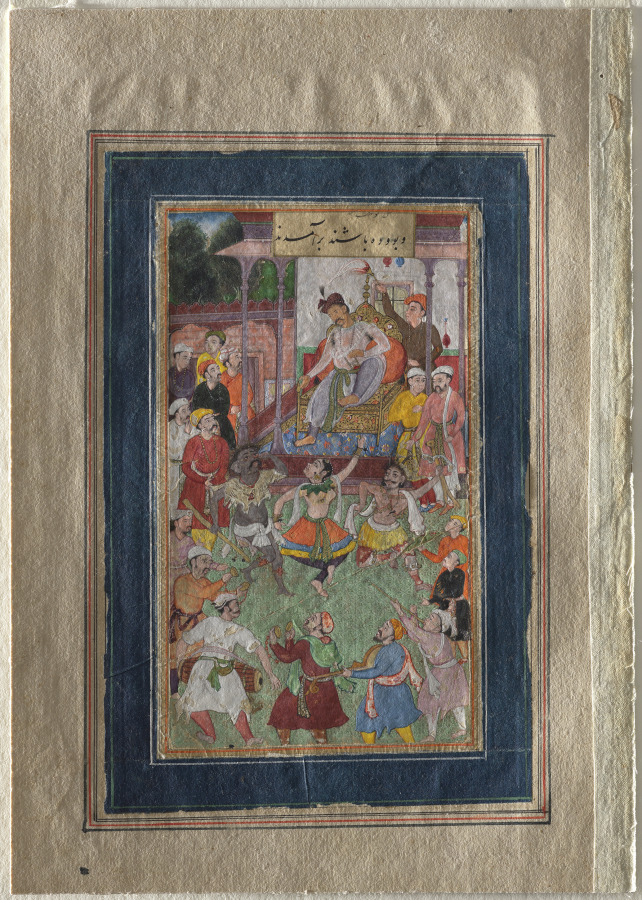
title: Grotesque Dancers Performing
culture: Mughal India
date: c. 1600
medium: gum tempera, ink, and gold on paper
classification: Painting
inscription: Unrelated later Persian text on recto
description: This scene from an unidentified manuscript depicts entertainers at the Mughal court. The dancers appear to be from the fringes of society, and they may be intended to depict tribal people or semihuman nature spirits. One is dark skinned with small elephant ears and red-rimmed eyes, wearing a white tiger-skin pelt. The female dancer wears a collar of leaves; the male figure on the right has horns, wears bells, and carries an animal-headed club that appears to be made of bone. An exuberant orchestra provides musical and vocal accompaniment below. While not an imperial production, this painting may reference the Mughal emperor Akbar’s practice of welcoming a wide range of people from all regions and traditions to his court, since he was interested in understanding their customs.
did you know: Akbar applied an aromatic paste under his arms, which stained his garment.